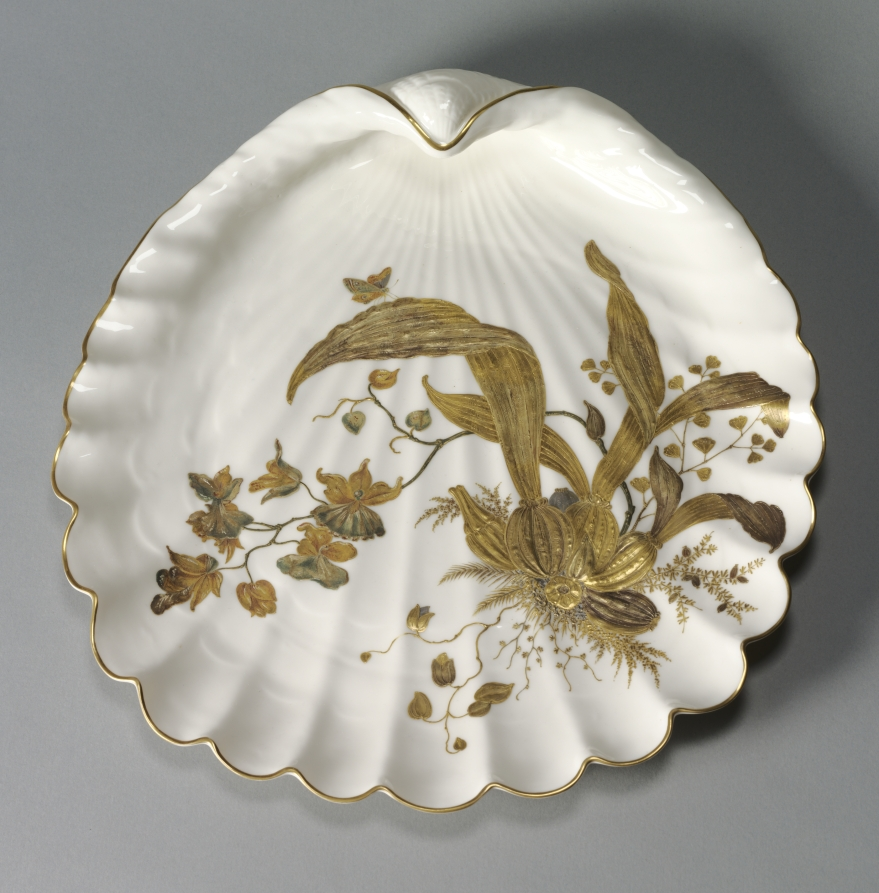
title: Tray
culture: America, New Jersey, Trenton, late 19th century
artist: Ott & Brewer Company (American)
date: 1882–1890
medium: porcelain with gilt decoration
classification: Ceramic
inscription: "Belleek,&" is printed above a horizontal crescent moon with the word "Trenton" in it. Initials "0" and "B" are printed over each tip of the crescent.